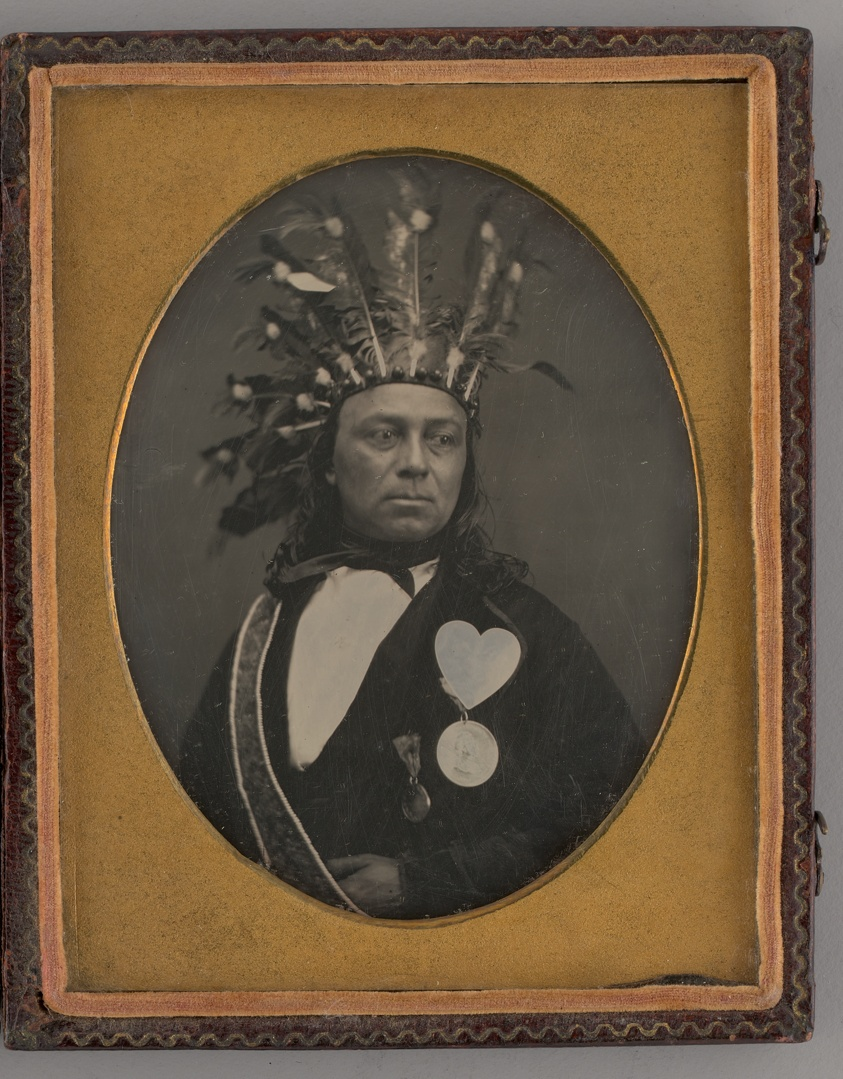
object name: Photograph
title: Untitled (Indian Chief Maungwudaus, Upper Canada)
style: 19th century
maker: Donald McDonnell (American, 19th century)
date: 1855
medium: Daguerreotype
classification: portrait; photograph; photographic process; photography; portrait; daguerreotype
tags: lundberg collection, photography, native american, headdresses, portrait, Male, men, portraits, portraits: male subject